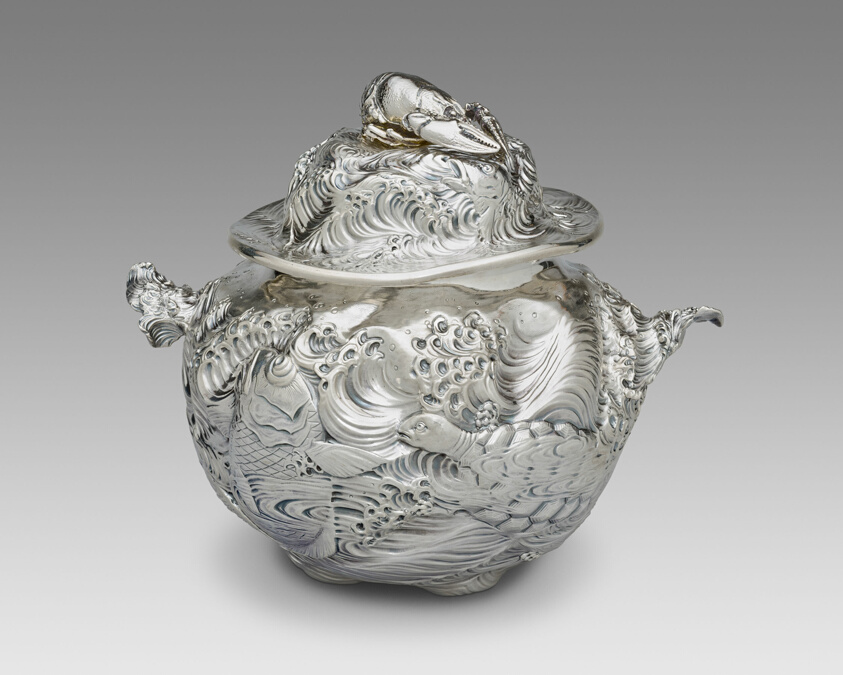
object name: Metalwork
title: Tureen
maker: Gorham Manufacturing Company (American, founded 1831); Providence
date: 1883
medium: Silver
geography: Providence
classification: vessel for serving food; decorative arts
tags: dining, drinking